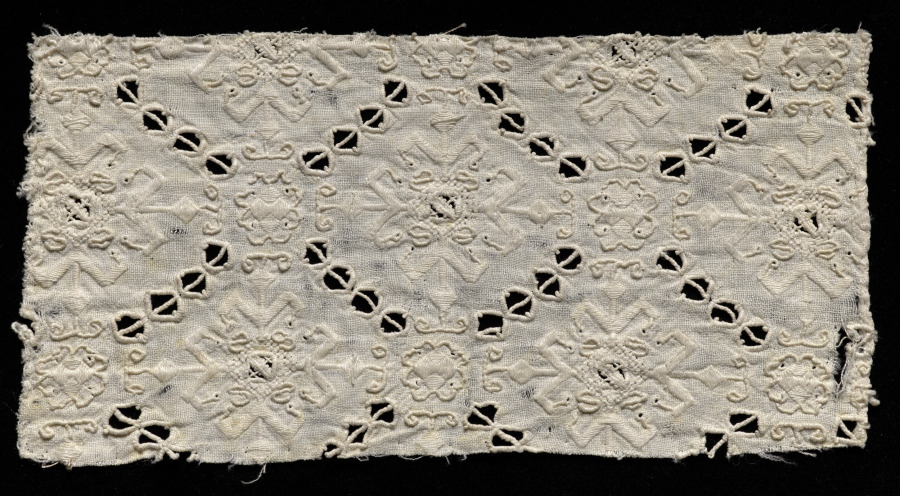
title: Lace Fragment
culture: Italy, 1600s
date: 1600s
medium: Linen: needle lace (cutwork)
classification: Lace